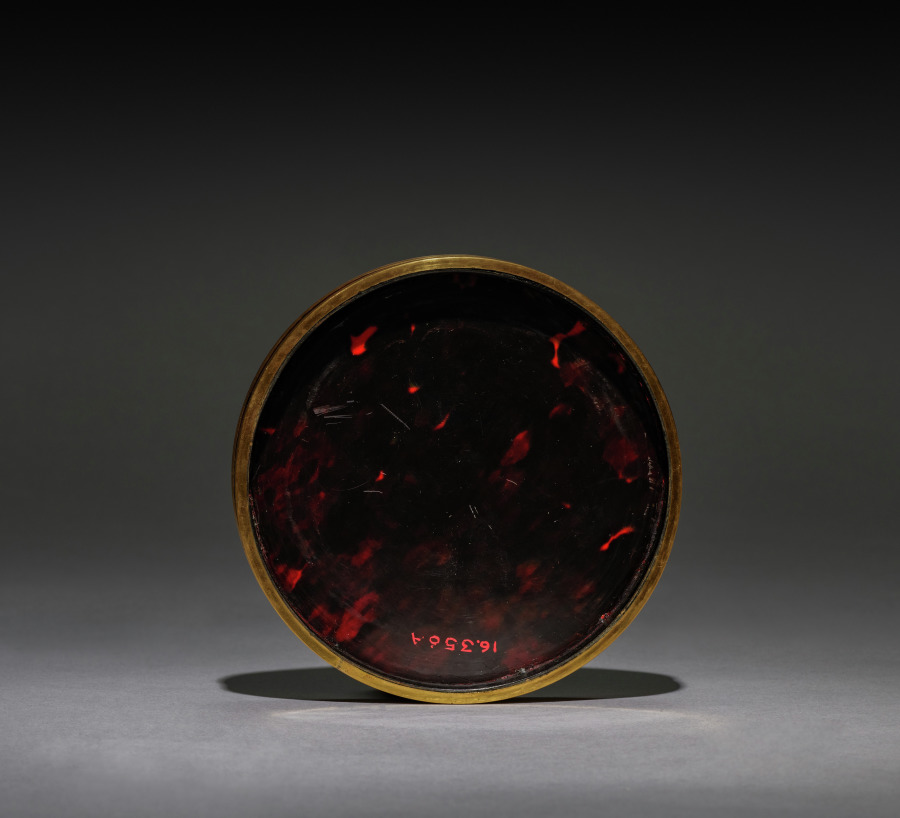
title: Cover for a Snuff Box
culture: France, 18th century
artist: after François Boucher (French, 1703–1770)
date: 1780–1800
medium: gold or gilt metal mounts; top with Vernis Martin style enameled decoration; sides and bottom enamel over gilt engine turned design; interior lined in tortoiseshell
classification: Miscellaneous